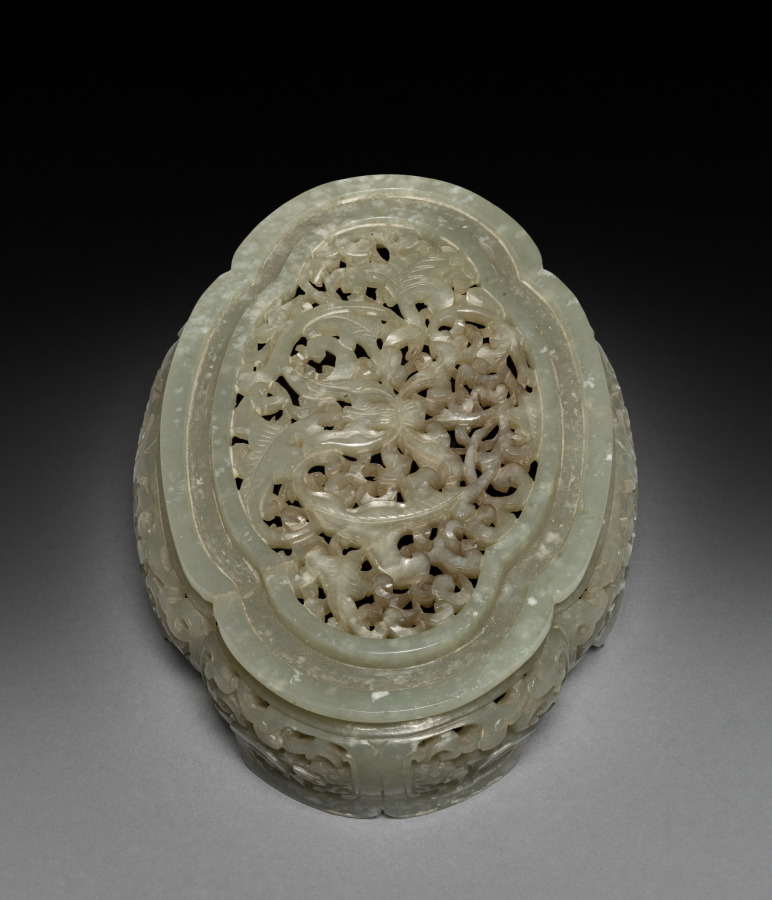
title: Oval Stand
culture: China, Qing dynasty (1644–1911), Qianlong reign (1736–95)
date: 1700s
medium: jade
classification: Jade